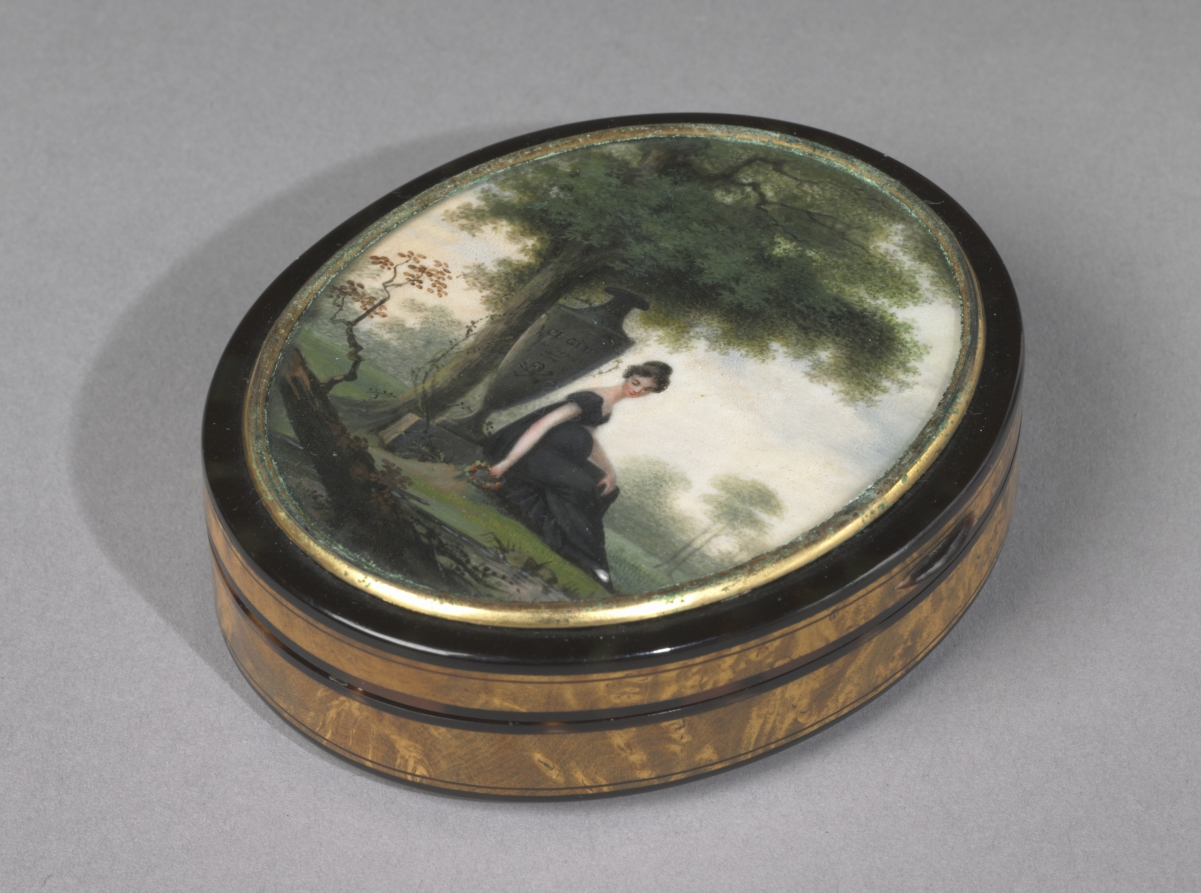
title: Snuff Box with Figures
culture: Continental, (France), late 18th century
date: late 18th century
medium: watercolor on ivory, wood and tortoiseshell with painted miniatues under glass and gilt metal mounts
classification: Miscellaneous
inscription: inscribed on funerary urn: "ci GIT" and below a scull and crossbones.